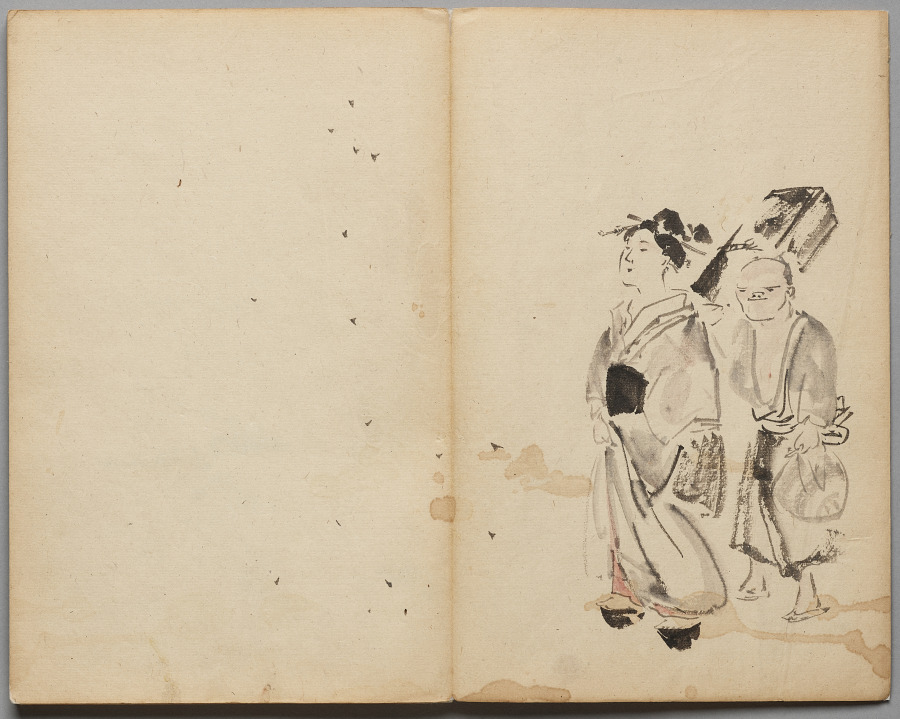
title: Woman and Servant from Sketch Album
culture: Japan, Edo period (1615–1868) to Meiji period (1868–1912)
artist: Kawanabe Kyōsai (Japanese, 1831–1889)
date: mid–late 1800s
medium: Accordion-style book of 26 double-leaves; ink and color on paper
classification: Bound Volume